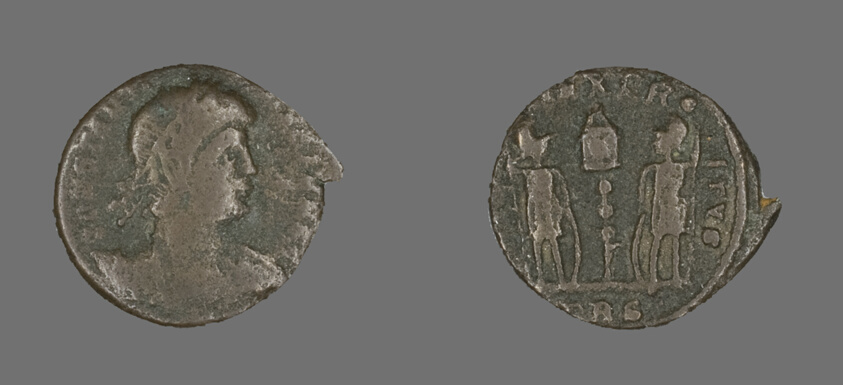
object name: Coin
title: Coin Portraying Emperor Constantine II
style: roman (ancient, style or period), ancient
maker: Roman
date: 324-361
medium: Bronze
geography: Roman Empire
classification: coin; ancient art